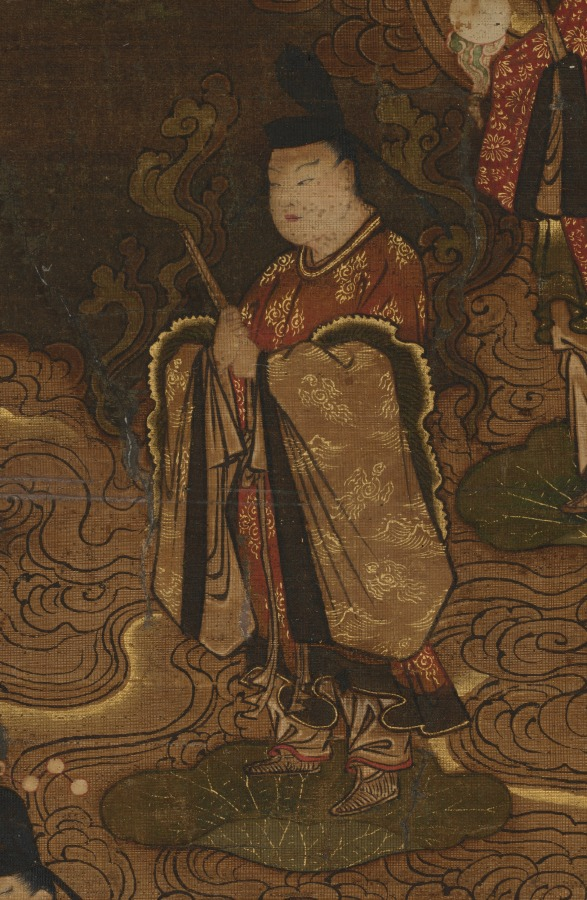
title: Descent of the Nine Luminaries and the Seven Stars at Kasuga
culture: Japan, Nanbokuchō period (1336–92)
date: mid- to late 1300s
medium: Hanging scroll; ink, color, gold and cut gold on silk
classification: Painting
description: This medieval religious painting shows celestial beings descending from the heavens into the Kasuga Shrine, a major religious site in Japan's ancient capital, Nara. The moon and the Kasuga mountain range appear in the uppermost portion of the painting, as does a red shrine entrance gate, or torii. In the upper part of the painting, figural representations of the stars in the constellation known as the Big Dipper in the West descend from right to left on cloud banks. In the lower part, the Nine Luminaries (Sanskrit: Navagraha) that emerged from the Vedic tradition—the sun and moon; the planets Jupiter, Mars, Saturn, Venus, and Mercury; and personifications of the fluctuating lunar nodes—descend in similar fashion. The painting uses the "deities in descent" scheme originating in China, as well as the original Buddhist form mandala (Japanese: honjibutsu mandarazu) format prevalent in medieval Japanese Shinto-Buddhist painting, to generate an image connected to the worship of celestial bodies in Esoteric Buddhism.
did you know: A 19th-century copy of this painting in ink and light color exists at the Kyoto City University of Arts.